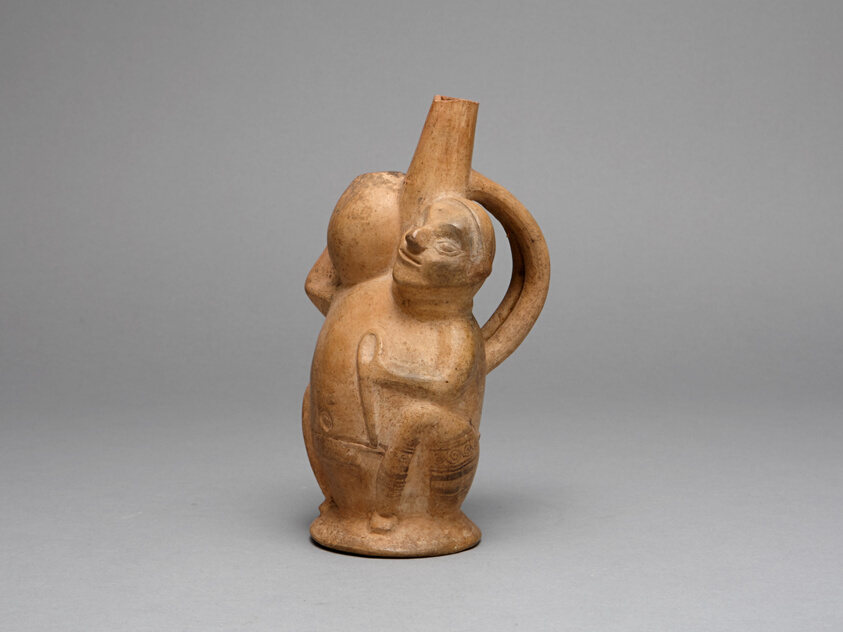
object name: Vessel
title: Handle Spout Vessel in the Form of a Seated Man Carrying a Jar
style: tiahuanaco, middle horizon, Pre-Columbian, americas, lambayeque, late intermediate period, Arts of the Americas, andean, andes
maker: Lambayeque (North coast, Peru)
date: 700–1000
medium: Ceramic and pigment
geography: Peruvian North Coast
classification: earthenware; ceramics; vessel; art of the americas